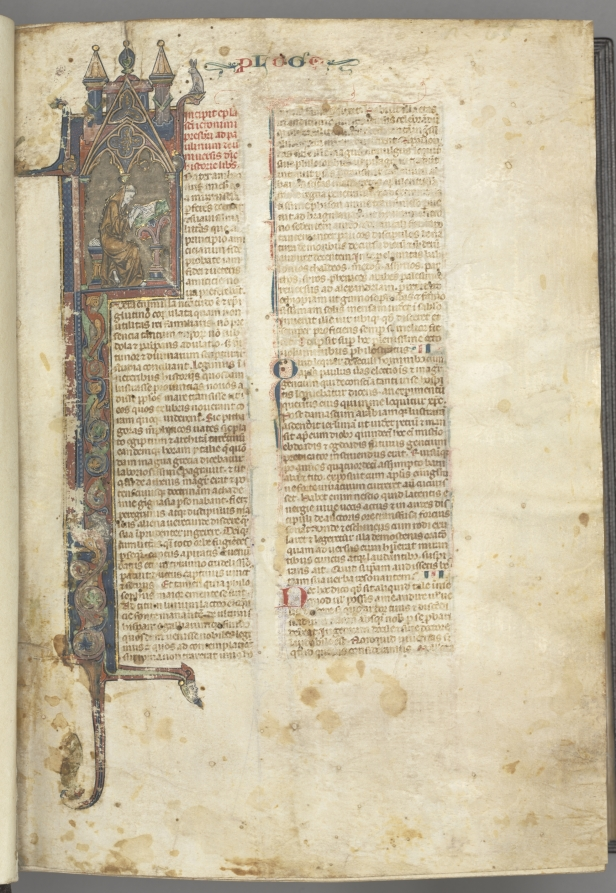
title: Fol. ir: Prologue, St. Jerome, large historiated initial I, the saint in a brown habit writing at a desk in a gothic architectural frame, with full-length border of foliage and small hybrids, a hare, a dog and a grotesque perched on the foliage extensions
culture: Southern France, Toulouse(?), 13th century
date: c. 1275–1300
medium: ink, tempera and gold on vellum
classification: Bound Volume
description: Biblical manuscripts were highly prized and important possessions of churches, monasteries, cathedral schools, and universities throughout medieval Europe. The biblical texts were known as the vulgate, the translations made by Saint Jerome in the fourth century from Hebrew and Greek into Latin, which became the definitive and official Latin version of the Roman Church. In the 13th century, the bible was, for the first time, produced as a single volume with an officially sanctioned sequence to its books and chapters as illustrated by this example. The very extensive decoration of this bible is arranged hierarchically to indicate the relative importance of the various texts so that full or almost full-page initials mark the openings of the first prologue, Genesis, and the first Gospel; historiated initials mark the beginning of each book and illuminated initials mark the Prologues.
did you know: Original texts of the Old and New Testaments were written in Greek and Hebrew.